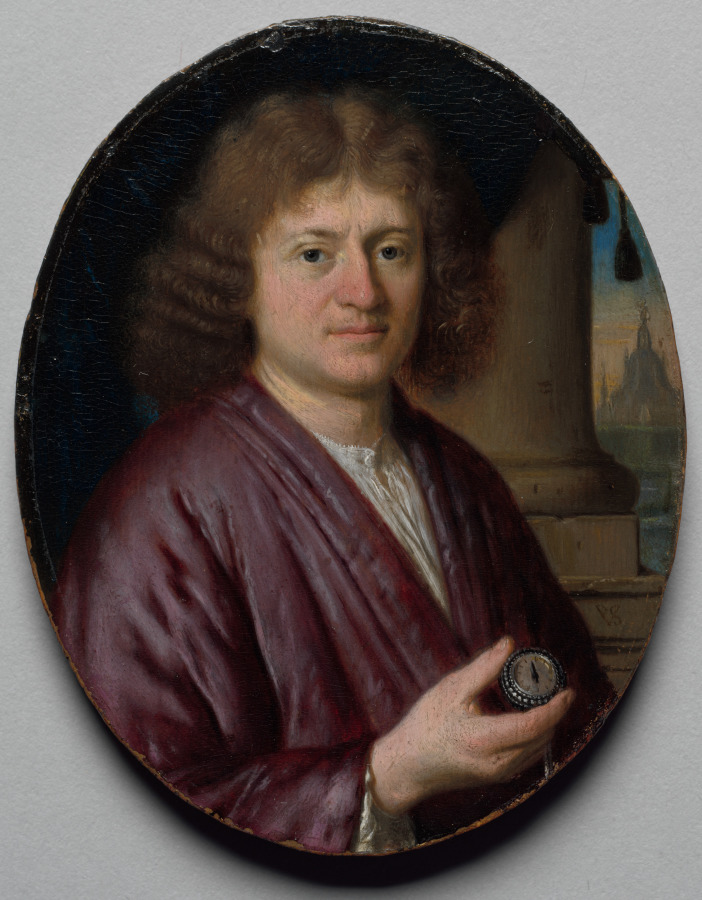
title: Portrait of a Man Holding a Watch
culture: Netherlands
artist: Pieter Cornelisz van Slingelandt (Dutch)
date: c. 1665–70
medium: oil on wood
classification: Painting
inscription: signed with monogram at right, lower center: PVS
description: Held in the hand or displayed in a private domestic space, miniature portraits were designed for intimate viewing. The sitter holds a watch, often a symbol of mortality and the passage of time. Like his colleague Gerrit Dou, Slingelandt was one of the Leiden fijnschilders (fine painters), a group of artists whose paintings were internationally recognized for their extraordinary detail and precise technique.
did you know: The domed building in the background of this portrait is the Marekerk, one of Leiden's most distinctive architectural landmarks.